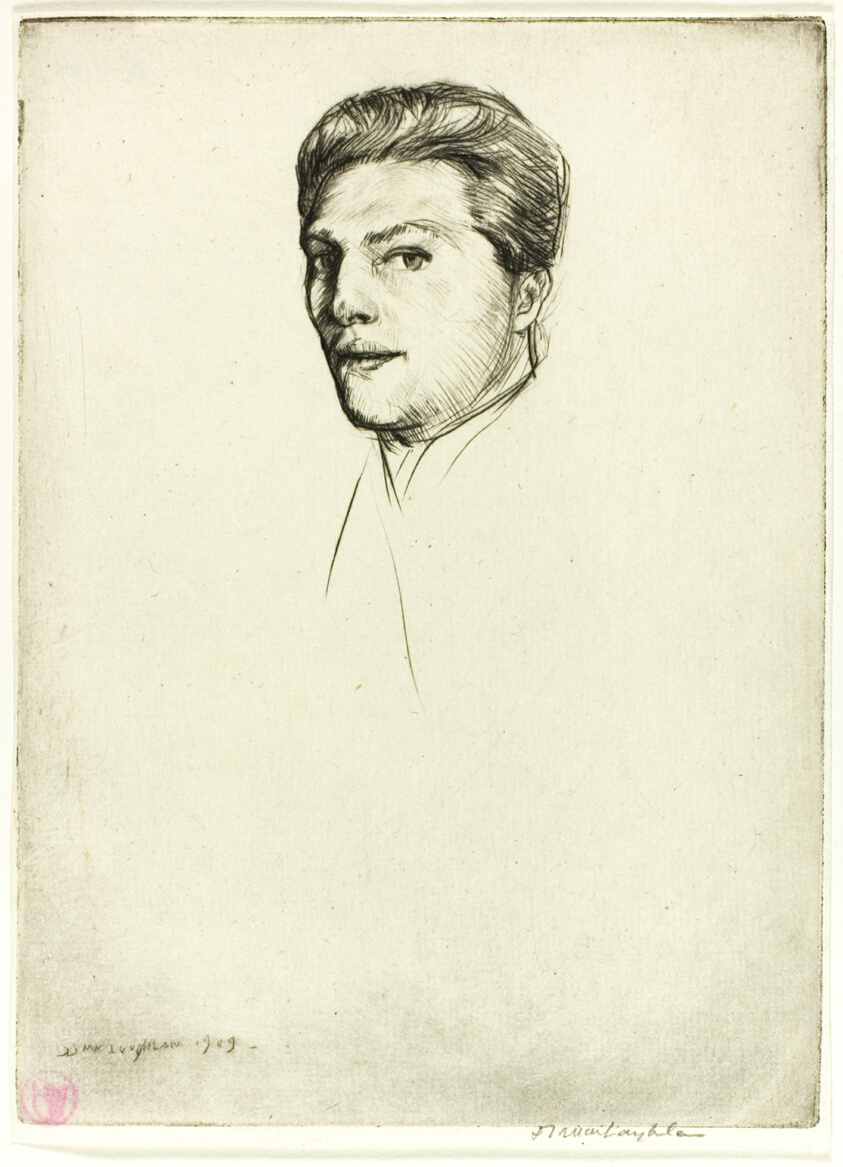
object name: Print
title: Drypoint Number Five: Portrait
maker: Donald Shaw MacLaughlan (American, born Canada, 1876-1938)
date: 1909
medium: Drypoint in black on cream laid paper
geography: United States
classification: drypoint; print; prints and drawing